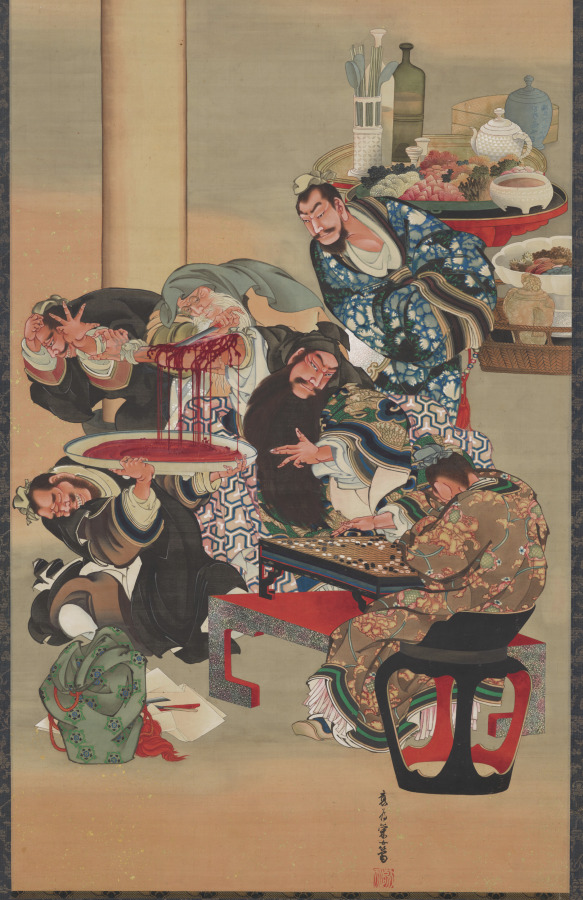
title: Operating on Guan Yu's Arm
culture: Japan, Edo period (1615–1868)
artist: Katsushika Ōi (Japanese, c. 1800-after 1857)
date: 1840s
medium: hanging scroll; ink, color, and gold on silk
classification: Painting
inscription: 款記「應為栄女筆」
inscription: 「葛しか」白文方印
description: Ukiyo-e artists’ subject matter extended to popular literature. Katsushika Ōi used color to great effect in her gruesome version of an episode from a 14th-century Chinese novel, Romance of the Three Kingdoms. Ōi portrayed the passage in which legendary 3rd-century military leader Guan Yu undergoes a bone scraping to remove poisons received from an arrow wound. In this sensationalist portrayal, Guan Yu’s attendants cower at the sight of his bloody arm while he remains unflinchingly focused on his game. As a woman, Ōi was an outlier in her era, but her talent was allowed to shine due to collaboration with her father, Katsushika Hokusai (1760–1849), the famed designer of the print known as The Great Wave.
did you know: This is the largest surviving painting by the artist.